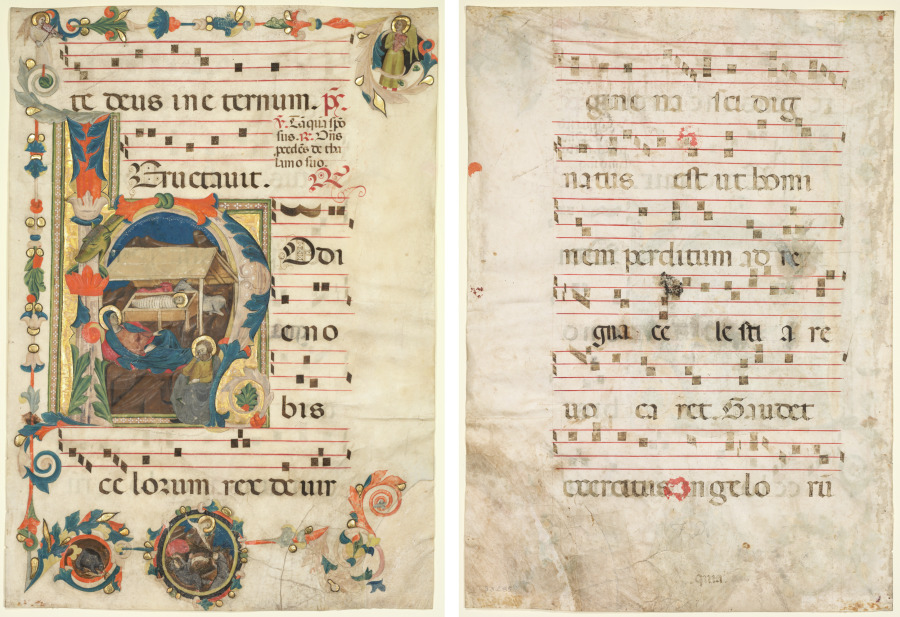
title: Leaf from an Antiphonary with Historiated Initial (H) with The Nativity (recto) and Music (verso)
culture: Italy, Tuscany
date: early 1300s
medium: ink, tempera, and gold on parchment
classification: Manuscript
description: This enormous initial h illustrates the beginning of the text of the first matins response for Christmas Day: Hodie nobis celorum rex (“On this day the King of Heaven”). The initial is appropriately decorated with a scene of Christ’s nativity. Along with other painters and illuminators, Neri da Rimini established the school of Rimini, characterized by a painting style owing much to the work of Giotto, who he perhaps encountered in Padua.